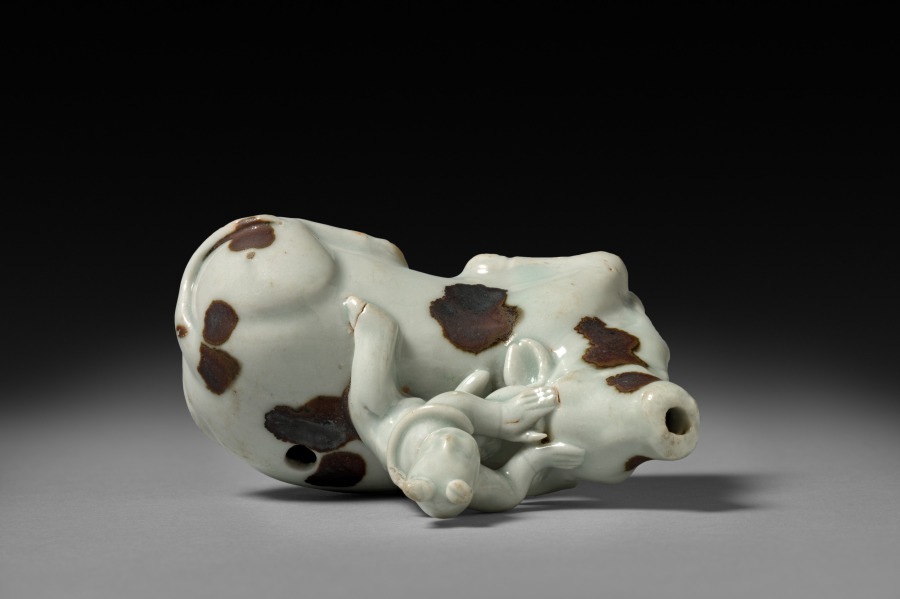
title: Buffalo with Rider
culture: China, Jiangxi Province, Jingdezhen kilns, Yuan dynasty (1271–1368)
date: early 1300s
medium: glazed porcelain with iron spots, qingbai ("blue-white") ware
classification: Ceramic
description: Boys tending buffalos were associated with a carefree life in the countryside free from the duties of officialdom. Water droppers contained water that was used to dissolve ink sticks into liquid ink for brush painting and writing.